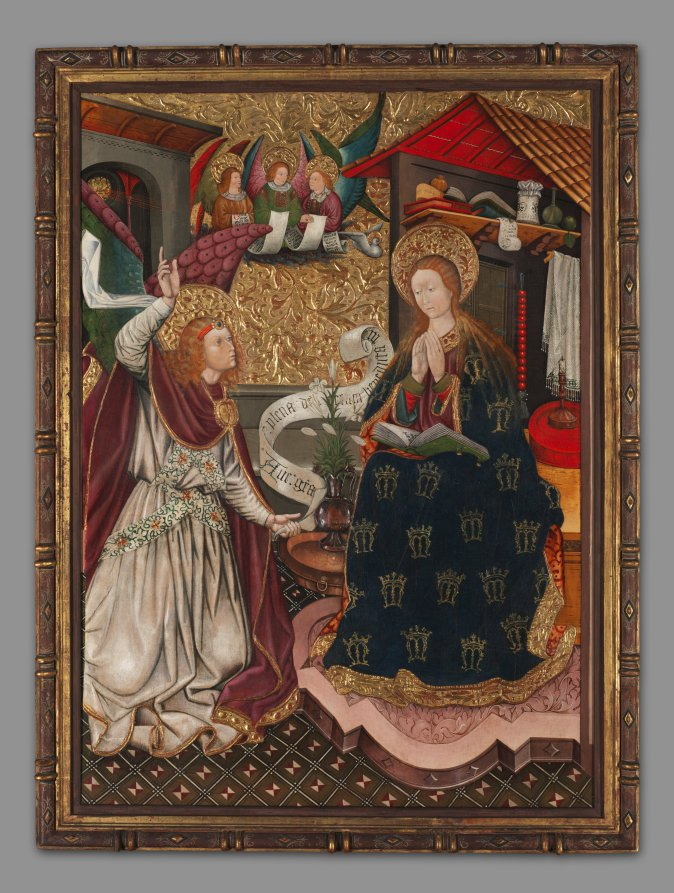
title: The Annunciation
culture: Spain, Catalonia, 15th century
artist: Jaume Ferrer the Younger (Spanish, Catalonia died c. 1460/70)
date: c. 1457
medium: oil, tempera, and gold on wood panel (fir)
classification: Painting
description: This and 1953.660.2 are believed to be the remaining components of a six-panel altarpiece. The large central panel is now preserved in Barcelona (Museu National d’Art de Catalunya). Ferrer collaborated with the painter Pere Garcia de Benavarri on this commission. Spanish works like these often feature elaborate treatment of the gold background, evident here in the exuberant raised decoration (called pastiglia) in the skies and the haloes, as well as other details. Here the archangel Gabriel proclaims the Virgin’s destiny as the mother of Christ. The setting is an ordinary house, but simple objects have symbolic meaning. The lilies represent the Virgin’s purity; the covered jar and water carafe symbolize inviolability; the pomegranate symbolizes Christ’s resurrection, while the apple alludes to humankind’s fall from grace. The towel and basin hint at ritual cleansing during Mass. The blown-out candle points to the arrival of divine light in the world. The two books, closed and open, refer respectively to the Old and New Testaments: one foretelling and the other fulfilling the promise of the messiah.